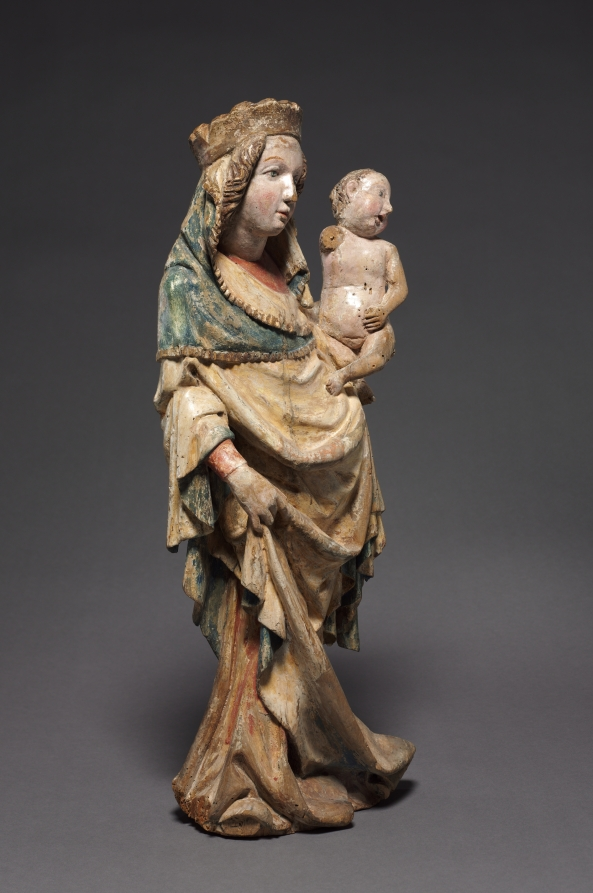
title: Madonna and Child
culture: Bohemia, vicinity of Freistadt, 15th century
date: c. 1400–1410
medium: lindenwood with polychromy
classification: Sculpture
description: This sculpture belongs to a type known as a Schöne Madonna or "Beautiful Virgin," popularized in central Europe during the late 1300s and early 1400s. The Virgin’s stance adheres to an S-curve as she stands with one leg straight and the other slightly bent at the knee. Her body is hidden beneath long, voluminous, draping garments. These so-called Beautiful Madonnas are among the most popular creations of Bohemian art and were in high demand for churches and private veneration.